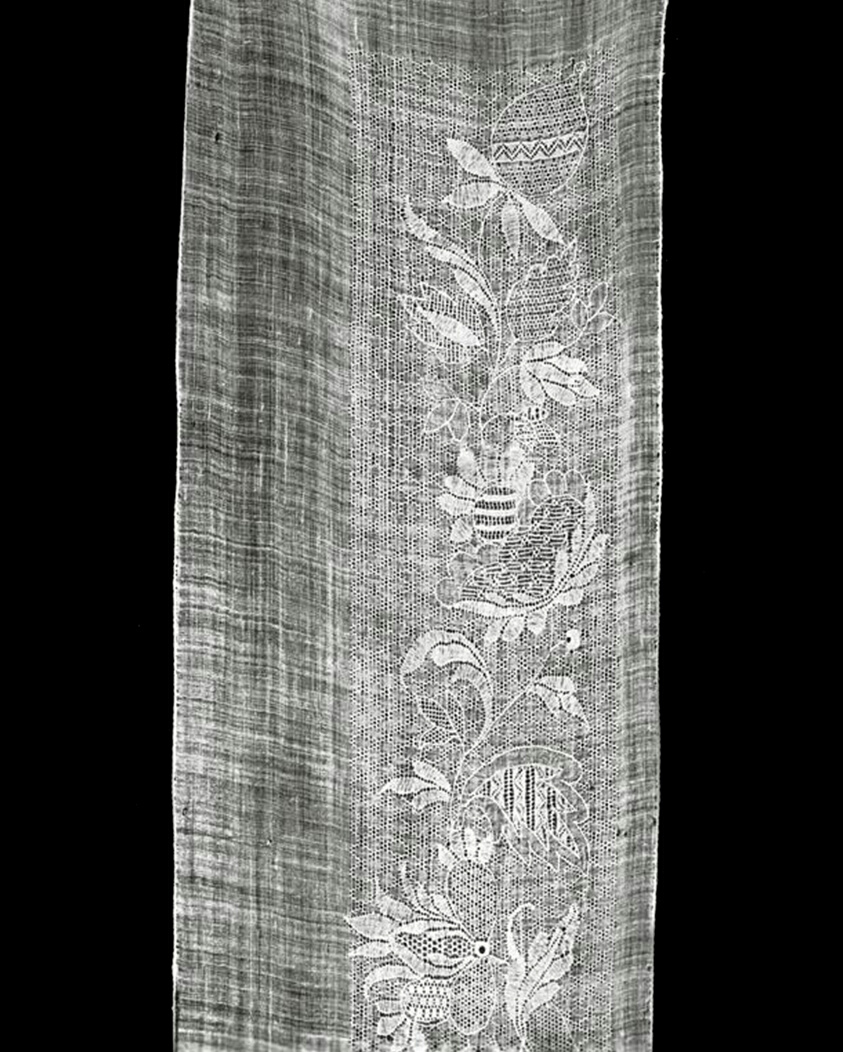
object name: Textile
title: Border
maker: France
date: 19th century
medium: Linen, plain weave; embroidered with linen yarns, pulled threadwork, embroidered in cable, cross, crossed back, variations of hem, interlocking lace, open buttonhole filling, overcast, pearl, satin, single faggot, and wave filling stitches; button-holed eyelets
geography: France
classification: textile; needlework (visual works)